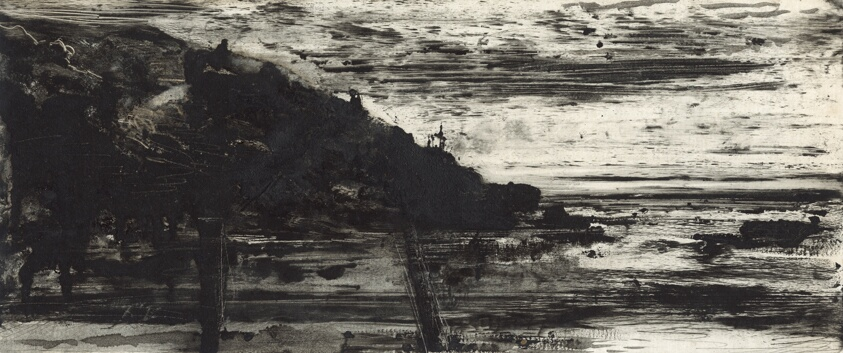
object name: Drawing and Watercolor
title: Seascape at Dinard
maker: Félix Buhot; French, 1847–1898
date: c. 1889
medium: Monotype in black, with black ink wash, on cream laid paper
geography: France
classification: prints and drawing; monotype; paper